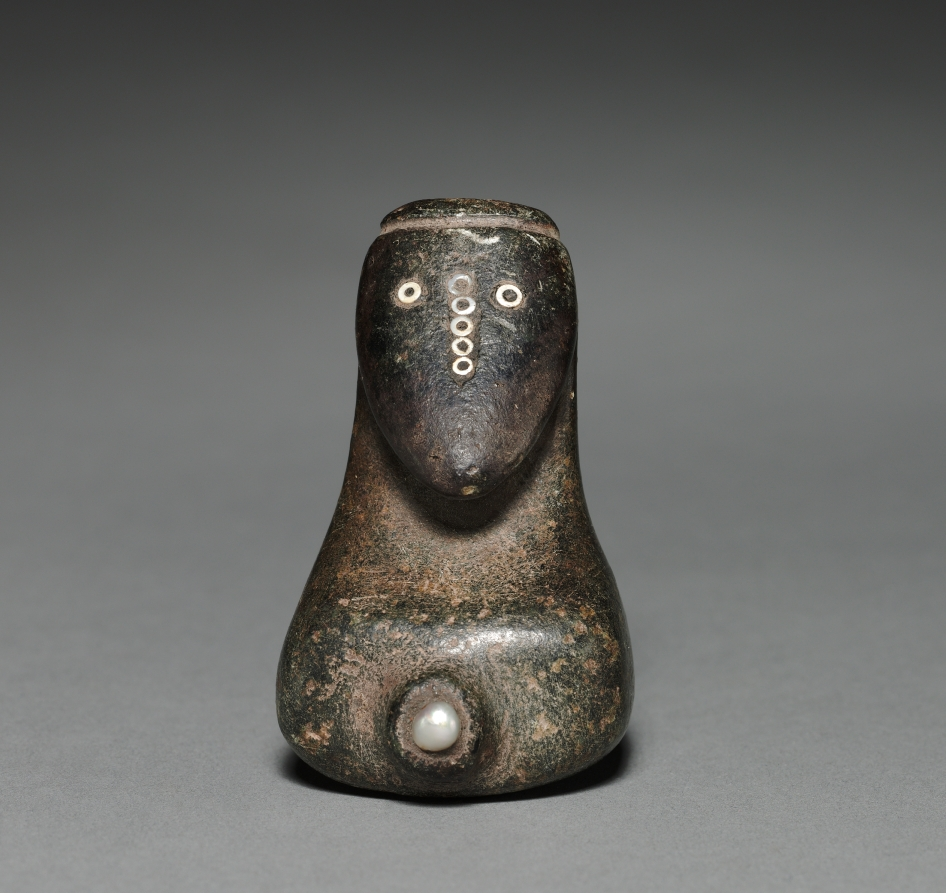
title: Pelican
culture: America, North American Indian, Channel Islands, Island of San Nicolas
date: 1800s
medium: stone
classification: Sculpture